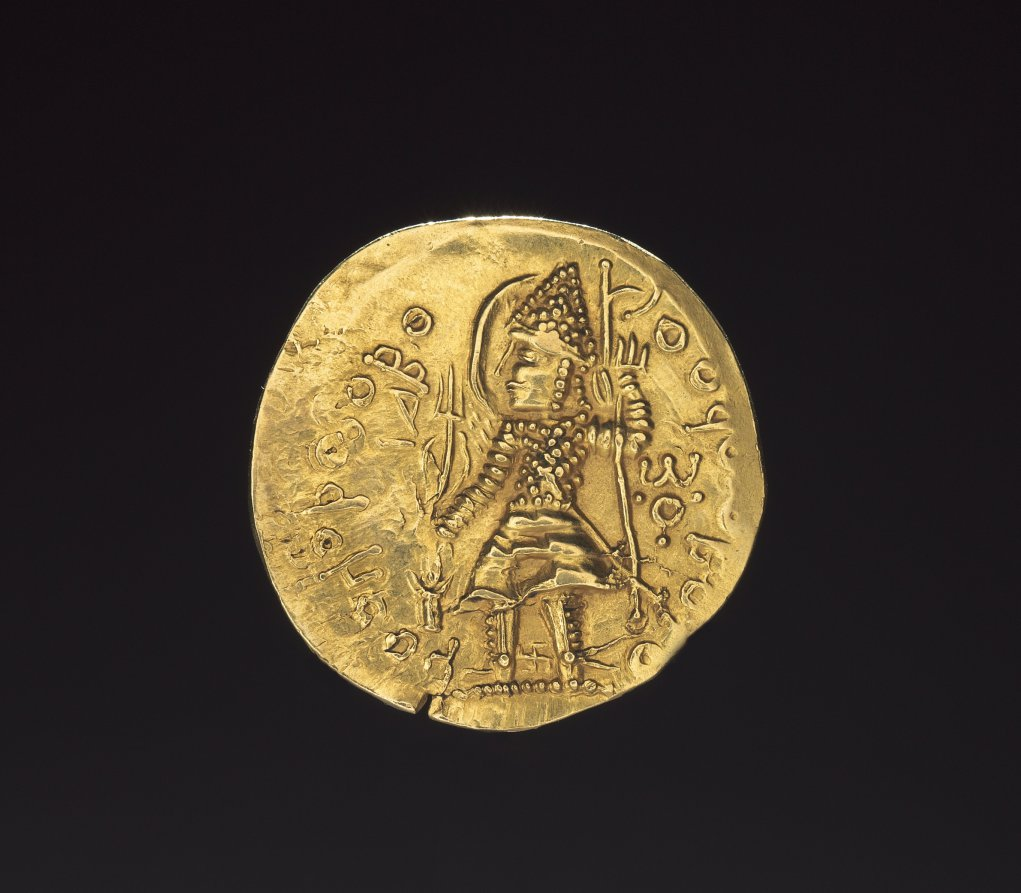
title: Golden Dinar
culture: India, Kushan, Vasudeva II (c. 275–300 CE)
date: 200s CE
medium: gold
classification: Coins